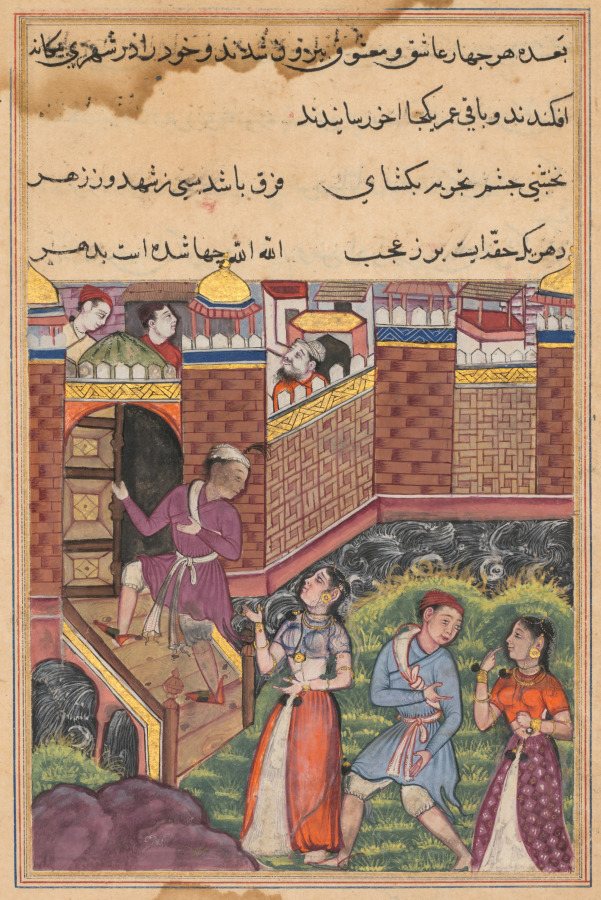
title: The two couples reach a foreign city where they make their home, from a Tuti-nama (Tales of a Parrot): Thirty-third Night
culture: Mughal India, court of Akbar (reigned 1556–1605)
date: c. 1560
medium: gum tempera, ink, and gold on paper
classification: Painting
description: Two pairs of lovers cross the bridge that leads to the gates of a new city. They have fled here together to live out the rest of their lives peacefully away from the machinations that would have otherwise kept them apart. Above the intricately patterned city walls, three men witness the group’s arrival.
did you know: The residents of the foreign city have much whiter skin than that of the protagonists.